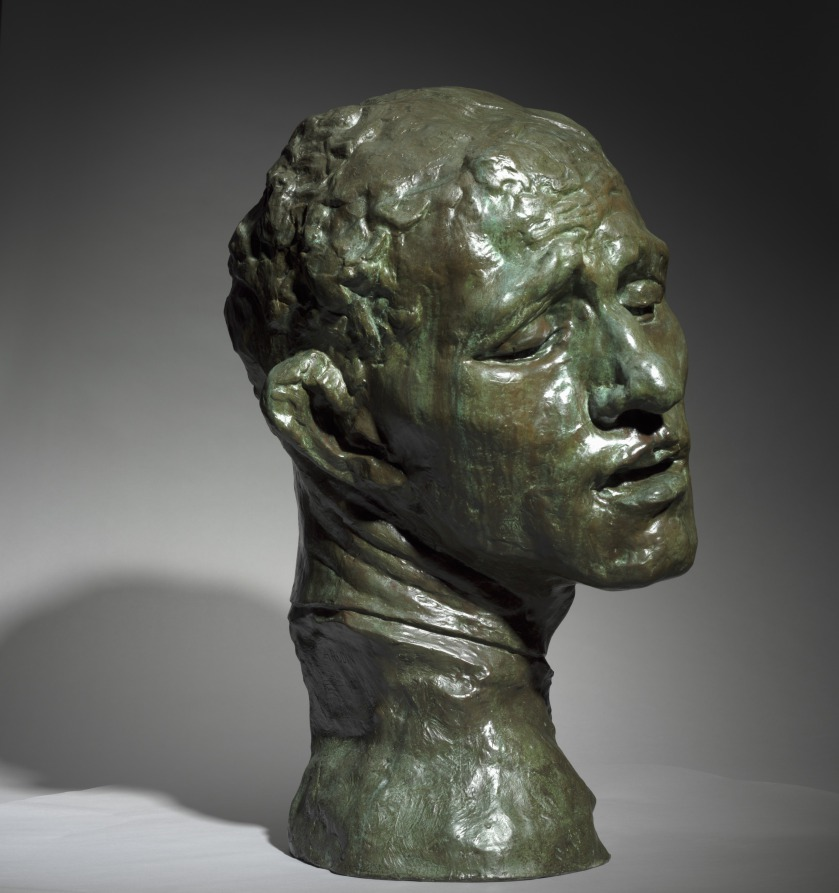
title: Heroic Head of Pierre de Wissant, One of the Burghers of Calais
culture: France, 19th century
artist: Auguste Rodin (French, 1840–1917)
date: 1886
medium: bronze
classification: Sculpture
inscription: inscribed at neck, left: A.Rodin; inscribed lower back: Alexis Rudier/Fondeur-Paris.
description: This sculpture depicts one of the figures in Rodin’s large public monument The Burghers of Calais (1884–89), featuring six French men who volunteered to be taken prisoner by the English in exchange for lifting the siege of Calais during the Hundred Years War (1337–1453). Pierre de Wissant’s anguished expression suggests extreme mental suffering as he contemplates his expected execution. Rodin exhibited a life-size version of the figure as an independent work before completing the monument. He later made multiple versions in various sizes and media.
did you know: This sculpture depicts the head of a figure from Rodin's large public monument The Burghers of Calais (1884-89). The CMA also owns a plaster version of the head.